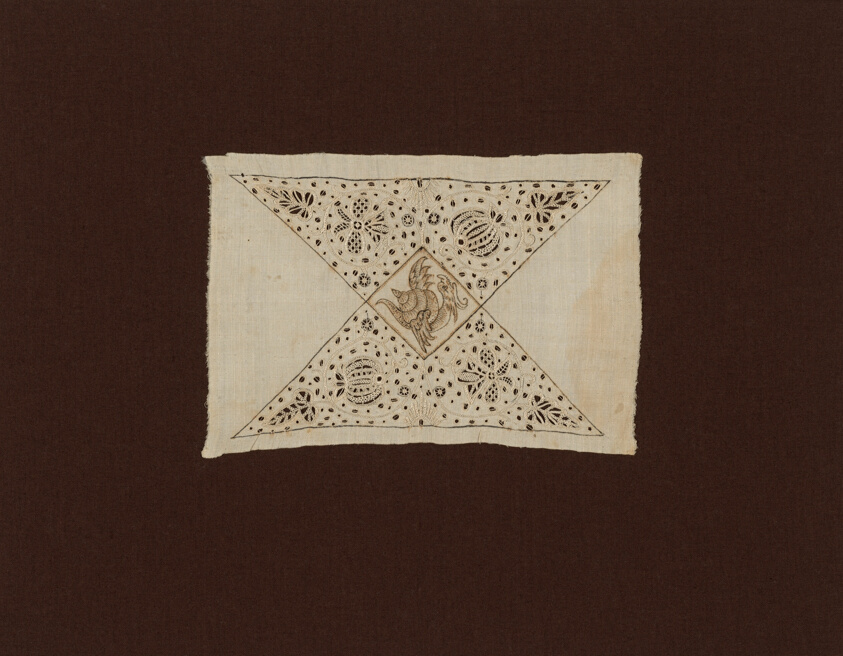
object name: Textile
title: Insertion from a Table Cloth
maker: England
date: 1601/25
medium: Linen, plain weave; ink drawing; embroidered with silk and linen in chain and running stitches; cut and drawn work embroidered with linen in buttonhole, overcast, and Russian overcast stitches; with needle lace filling stitches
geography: England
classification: textile; needlework (visual works)